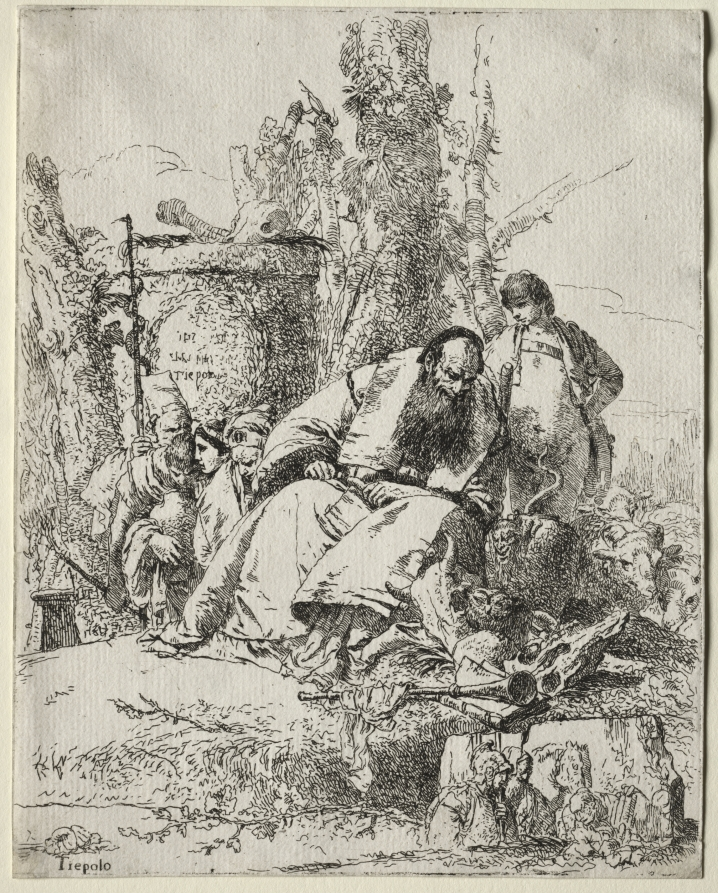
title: Scherzi di Fantasia: seated Magician, boy and four figures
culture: Italy, 18th century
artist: Giovanni Battista Tiepolo (Italian, 1696–1770)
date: 1750–60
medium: etching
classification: Print